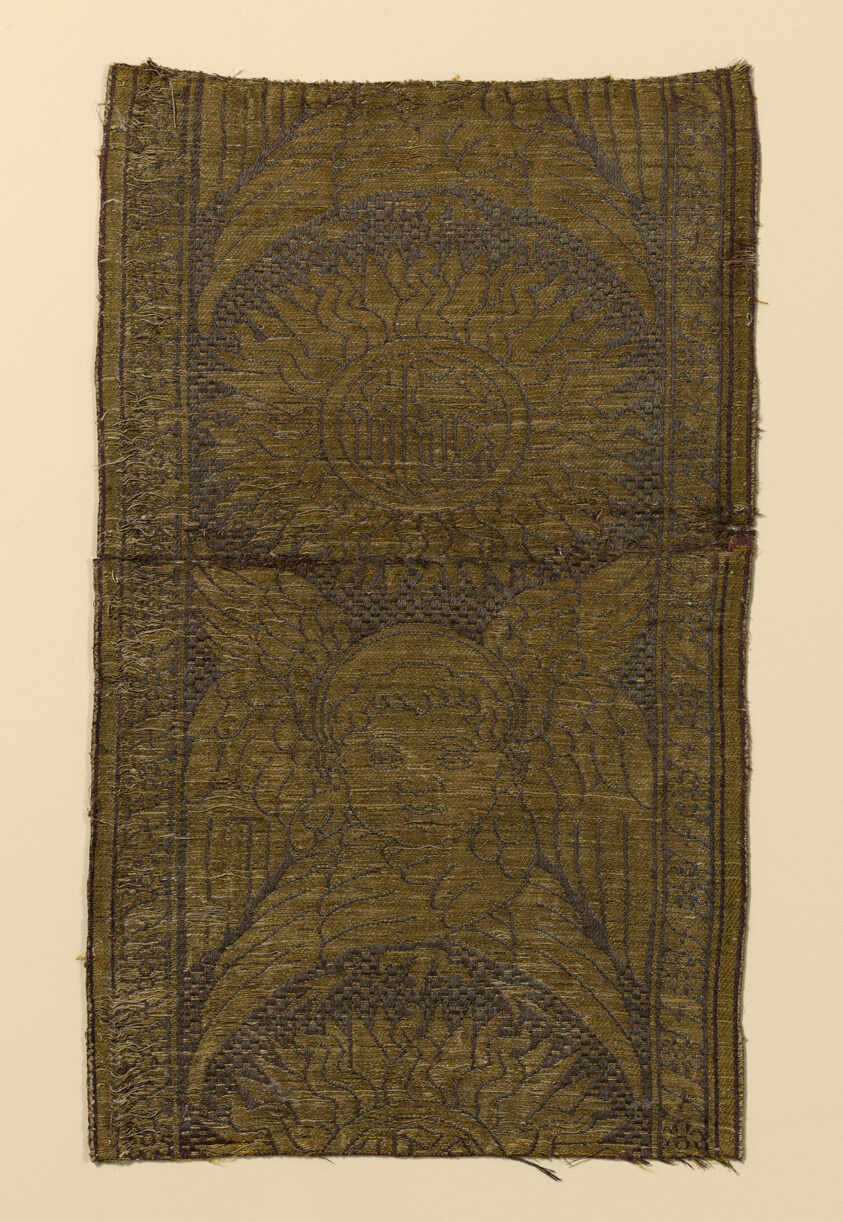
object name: Textile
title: Fragment from an Orphrey Band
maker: Italy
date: 15th/16 century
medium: Silk, gold gilt strip wound around linen fiber core, integrated compound weave of warp-float faced satin weave and twill weave with supplementary patterning wefts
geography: Italy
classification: textile; weaving; liturgical